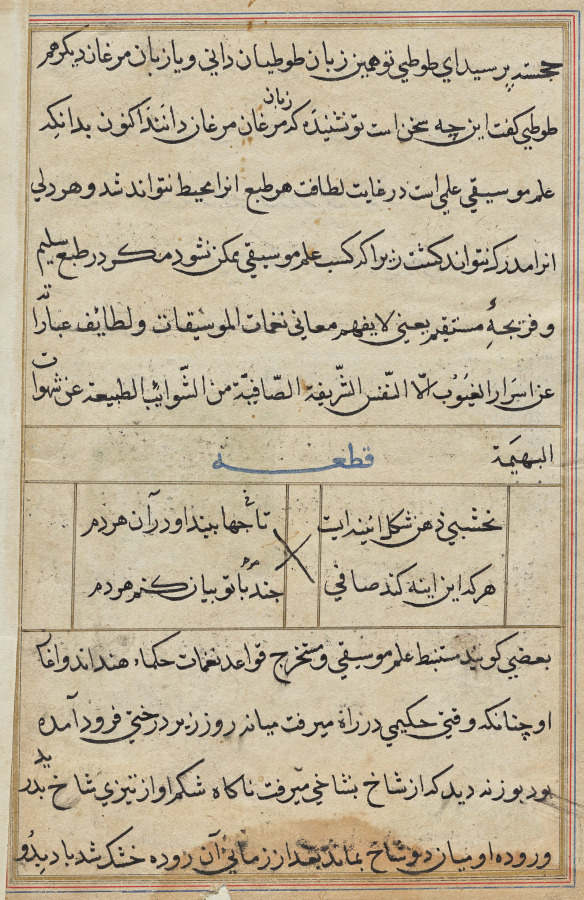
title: Page from Tales of a Parrot (Tuti-nama): text page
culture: Mughal India, court of Akbar (reigned 1556–1605)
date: c. 1560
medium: gum tempera, ink, and gold on paper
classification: Painting